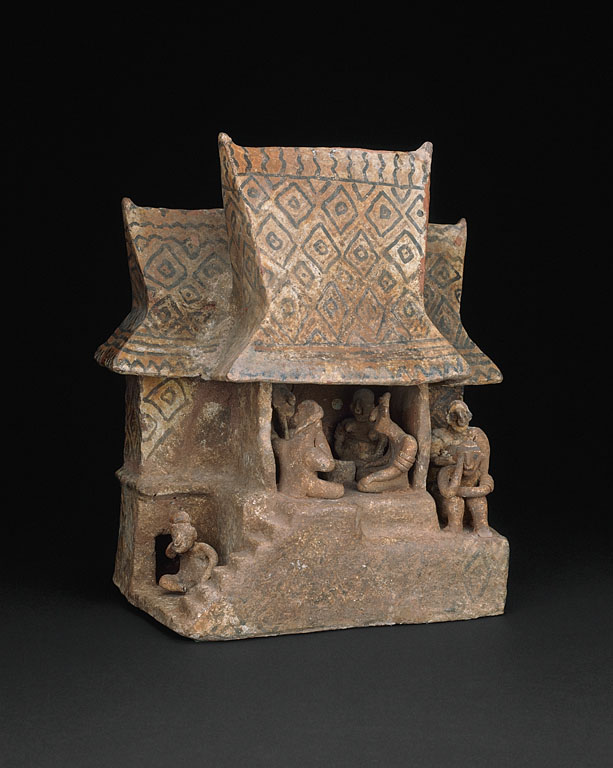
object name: Sculpture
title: House Model with Ritual Feast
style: nayarit, mesoamerican, Pre-Columbian, americas, west mexico, ixtlán del rio, Arts of the Americas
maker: Nayarit (Ixtlán del Río, Nayarit, Mexico)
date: 100 BCE–300 CE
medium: Ceramic and pigment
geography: Nayarit state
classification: earthenware; art of the americas; ceramics; sculpture; funerary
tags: architecture, funerary art, people, drinking, communities, temple, ritual, houses, feast